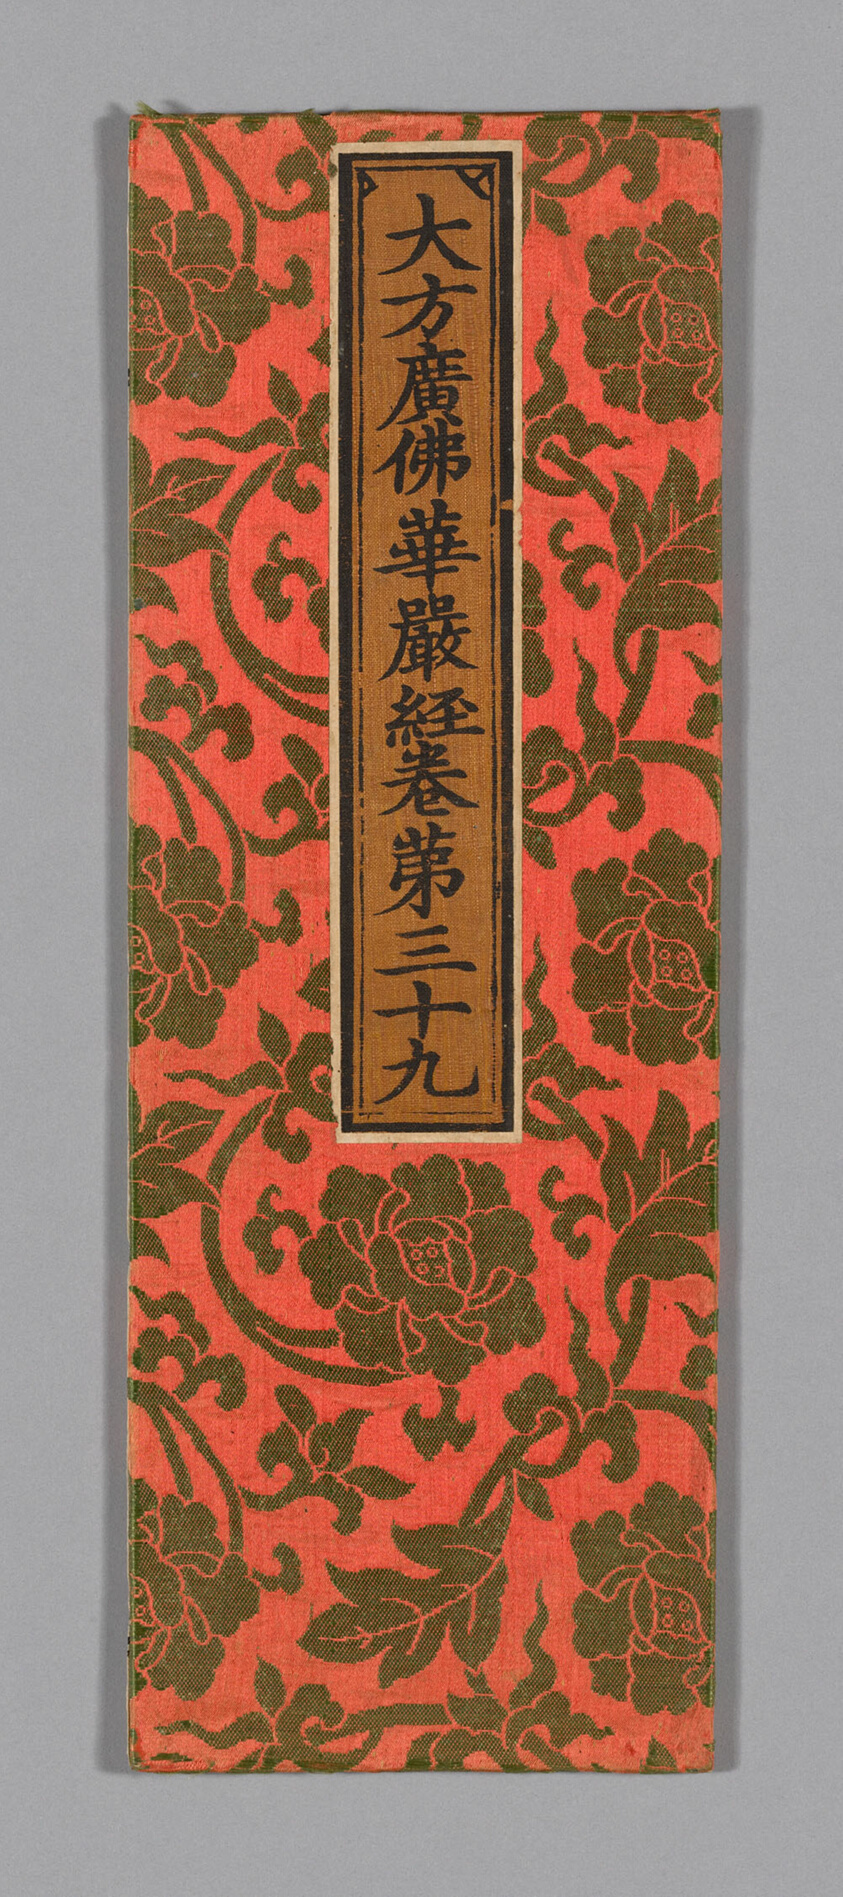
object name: Textile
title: Sutra Cover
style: ming, Chinese (culture or style), East Asian, asian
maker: China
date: Ming dynasty (1368–1644), c. 1590's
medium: Silk, satin weave with patterning wefts; wrapped over cardboard and backed with paper; applied label of silk, plain weave; with inscribed title painted and/or printed with ink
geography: China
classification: textile; weaving